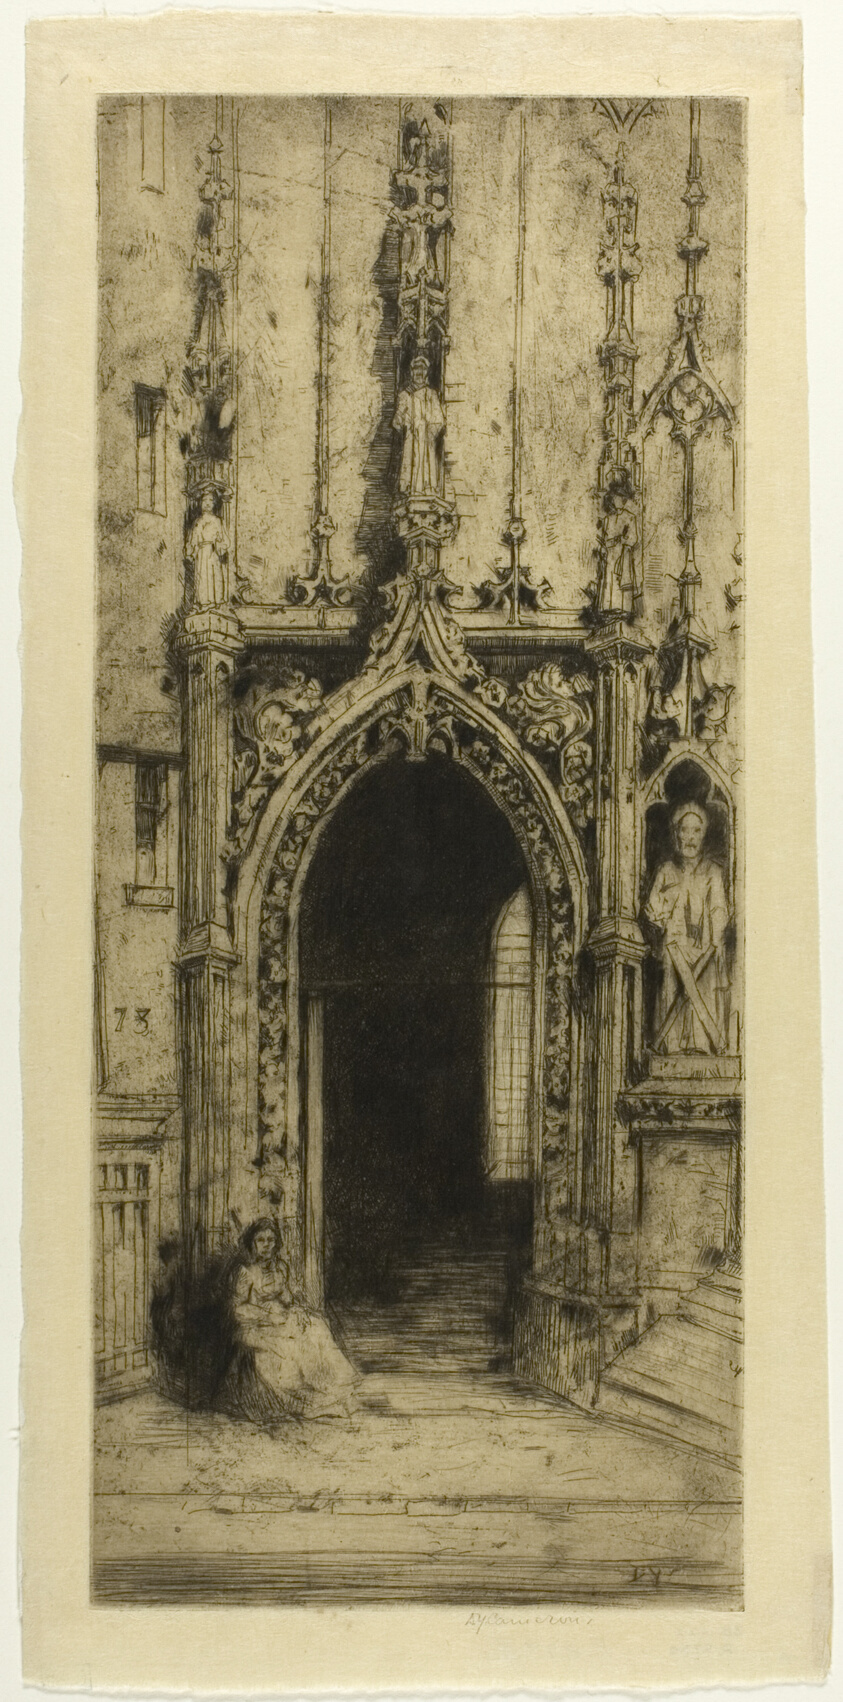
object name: Print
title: St. Merri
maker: David Young Cameron (Scottish, 1865-1945)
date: 1906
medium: Etching and drypoint on cream Japanese paper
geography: Scotland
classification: etching; print; prints and drawing